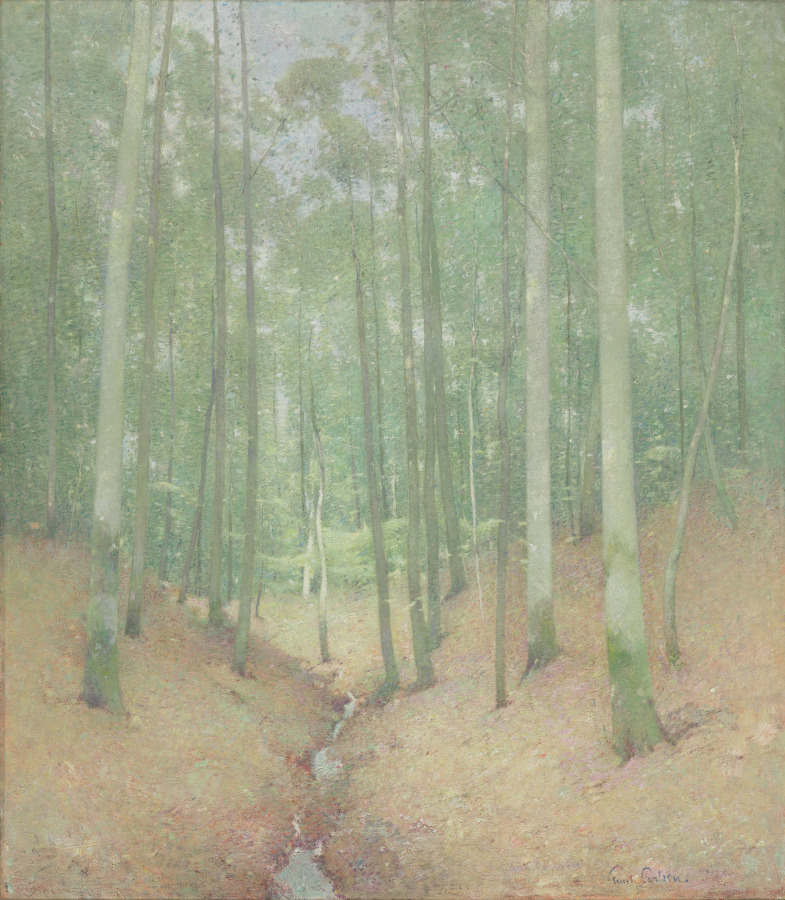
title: Wood Interior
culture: America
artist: Emil Carlsen (American, born Denmark, 1848–1932)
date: c. 1910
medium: oil on canvas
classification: Painting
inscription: signed lower right: Emil Carlsen.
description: Through luminescent color, filtered light, and a subtle evocation of atmosphere, Carlsen created a quiet, meditative mood in Wood Interior. The delicate trees, trickling brook, and soft bed of the forest floor invite a tranquil retreat from bustling city life. The painting’s lighter palette is complemented by its custom-made gilded frame, which is crafted in muted 16-karat gold rather than the standard, more vibrant 18-karat.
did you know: Carlsen’s son Dines also became a professional artist, and the two exhibited together several times.